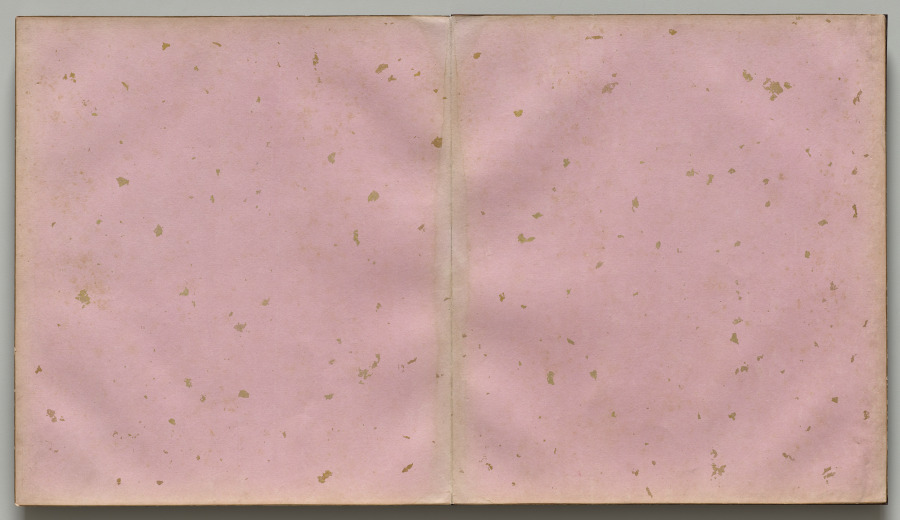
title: Absorb the Past; Abandon the Present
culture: China, Qing dynasty (1644–1911)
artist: style of Qian Hui'an (Chinese, 1833–1911)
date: 1800s–1900s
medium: Accordion-style album of 10 painted leaves; ink and color on silk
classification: Painting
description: Qian Huian, active in Shanghai, was best known for his paintings of beautiful women, and historic and mythological figures, rendered in a distinct style. His figures appear eccentric and the color palette pale to pink. The album’s title, Absorb the Past, Abandon the Present, reflect the desire to find refuge in China’s Past, as the country was going through the devastating Taiping rebellion at the time the paintings were created.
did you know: Leaf four depicts Tao Yuanming, carried by servants in a basket as he had an ailing foot. Tao wrote the Peach Blossom Spring tale, in which a fisherman loses his way and ends up in a utopia.